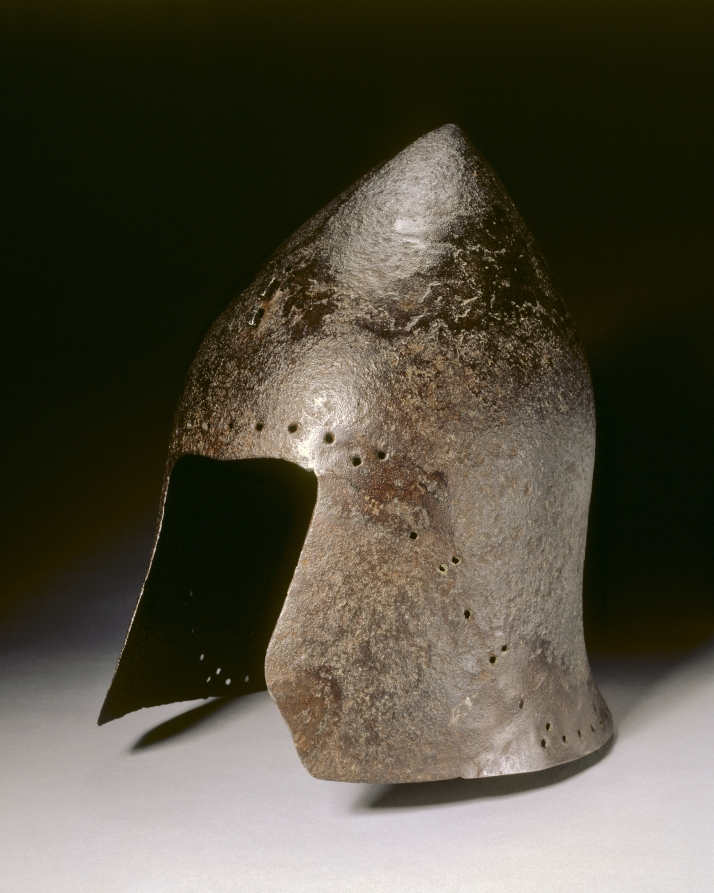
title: Barbute (from the Venetian Garrison at Chalcis)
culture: North Italy, 14th-15th century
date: c. 1350–1420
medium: iron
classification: Arms and Armor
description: This is a rare example of a type of helmet used from about 1350 to 1480. Its conical shape deflected glancing blows to the head. Italian chronicles refer to professional men-at-arms as barbuti. The word derives from the Italian barba, or beard, a reference to the hood of mail often attached to these early helmets. The row of small holes along the face opening and neck were for the attachment of the hood and lining.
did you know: This helmet and a number of others were apparently excavated from the Venetian garrison at Chalcis on the Greek island of Euboea.